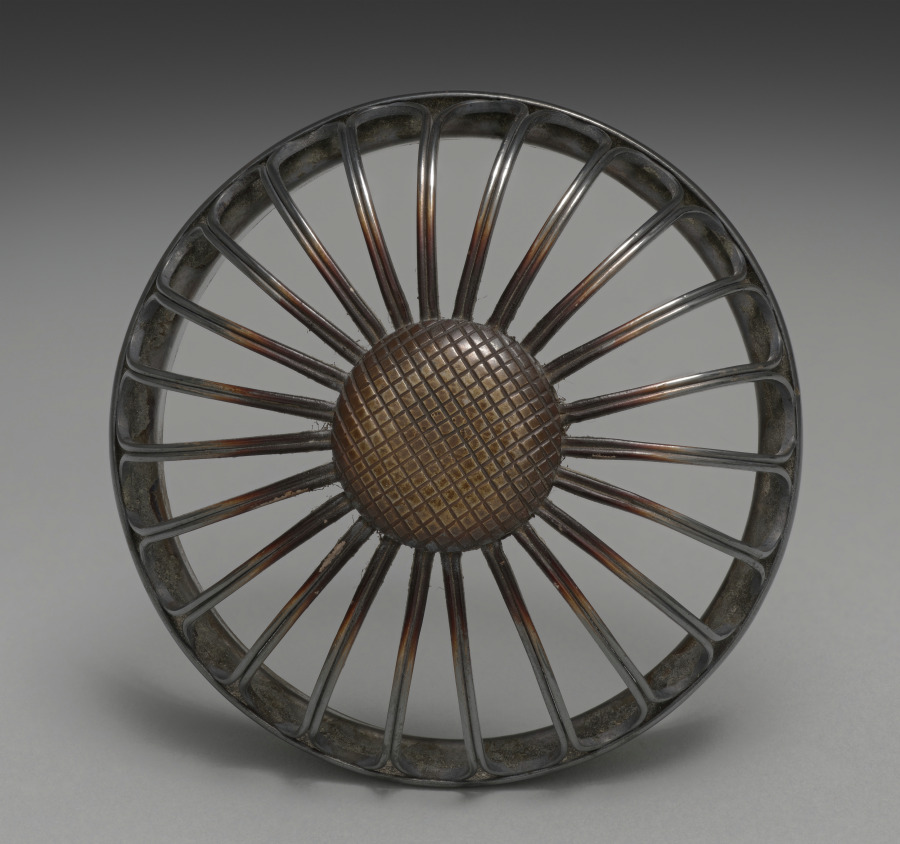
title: Lid for an Incense Burner with Flowers and Dots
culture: Japan, Meiji period (1868–1912)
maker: Seifū Yohei III (Japanese, 1851–1914)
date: 1893–1914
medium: Silver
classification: Ceramic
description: Yohei III made incense burners in a wide variety of designs and styles. The body and glaze of this one are taihakuji, or “great white porcelain,” an important early invention Yohei III devised in 1872 that involved the combination of a distinctive translucent, creamy glaze over an ivory-colored clay body. The silver lid is meant to look like a single flower. The vessel has tapering legs with a combined curvilinear and geometric design; the bands encircling the middle have simple, incised flower motifs alternating with single dots.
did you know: The silver lid was produced outside the studio by metalwork specialists.